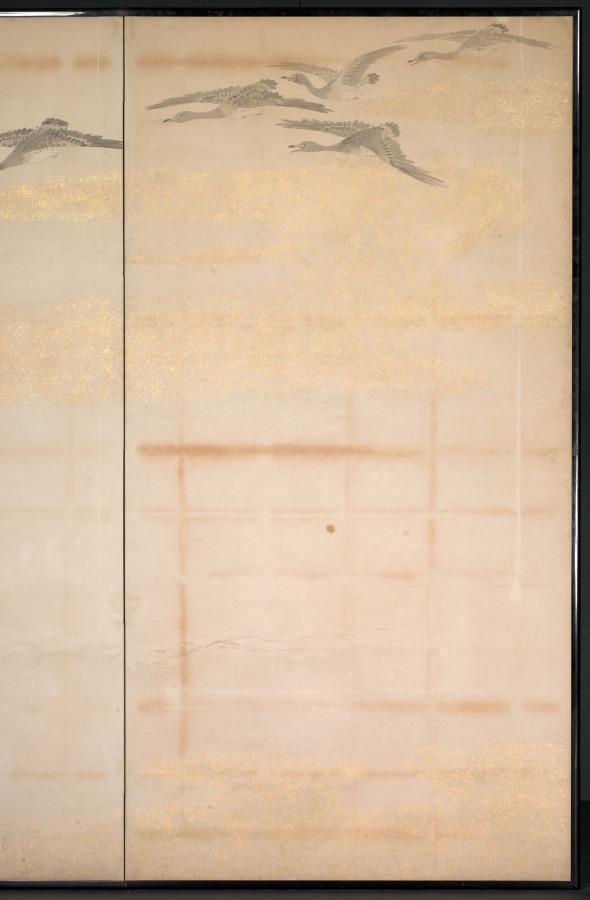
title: Geese, Reeds and Water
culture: Japan, Edo period (1615–1868)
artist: Yamamoto Baiitsu (Japanese, 1783–1856)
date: 1800s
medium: One of a pair of four-panel folding screens; ink, color, and cut gold foil on paper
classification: Painting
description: This byōbu composition differs from most in that it comprises two four-panel screens, rather than two six-panel units. Since the current mounting is modern, it is impossible to determine whether its present configuration represents its original design. Some panels may have been removed to help the screens better fit into a modern interior space. Baiitsu worked almost exclusively in monochromatic ink tones and favored classical Chinese painting themes.